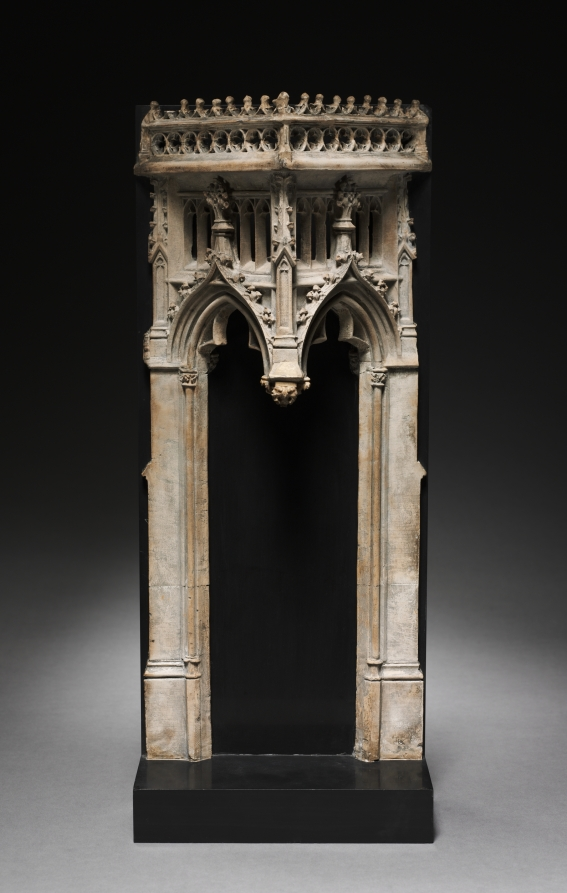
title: Architectural Canopy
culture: France, Burgundy, 15th century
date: c. 1450–1475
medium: limestone from Tonnerre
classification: Sculpture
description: Part of a pair of canopies, both must have originally belonged to an architectural ensemble like a tomb or a choir screen set within a church. Strikingly carved as architecture in miniature, they contain all of the elements of Flamboyant Gothic architecture of the late 15th century, so named after its flame-like stone tracery with wavy ornaments. This style of architecture is characterized by its intricacy of detailing and virtuosity of workmanship. Small sculptures may have originally occupied the space beneath the canopies.